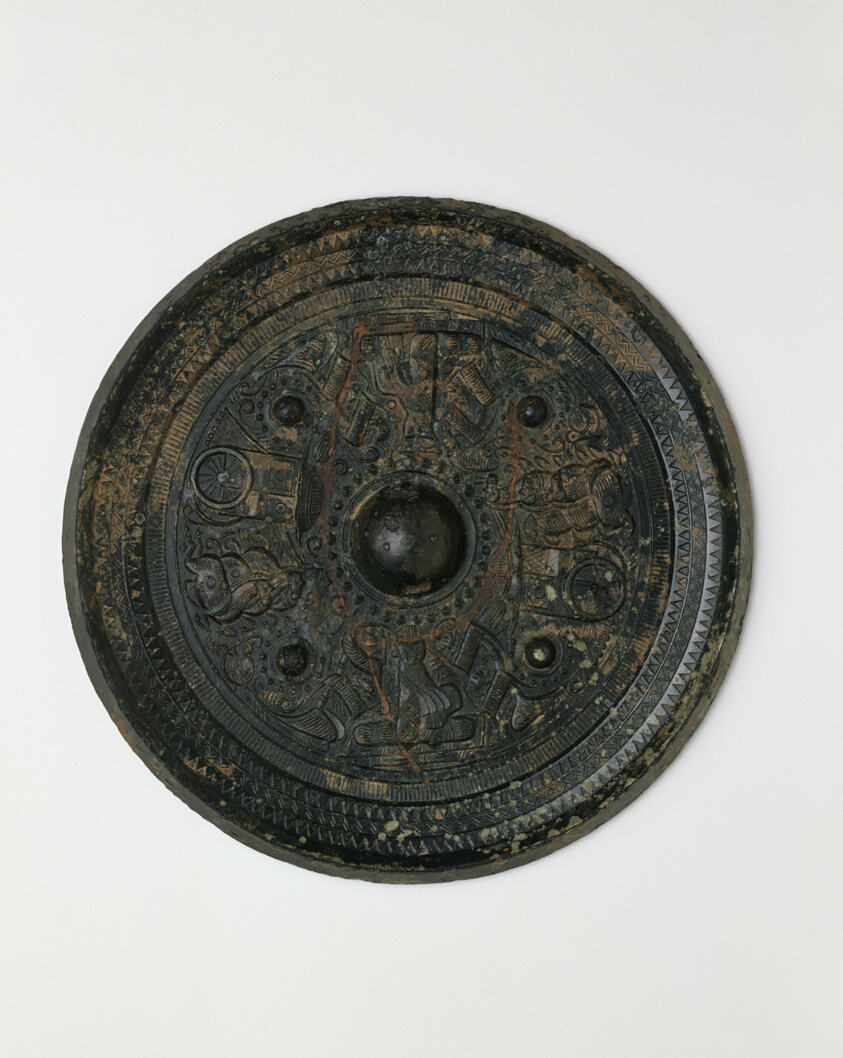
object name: Decorative Arts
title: Mirror with Images of Daoist Deities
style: Chinese (culture or style)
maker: China; probably from Zhejiang province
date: Eastern Han dynasty (25–220 CE), 2nd or 3rd century CE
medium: Bronze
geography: China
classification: bronze; metal; mirror; asian art; decorative arts